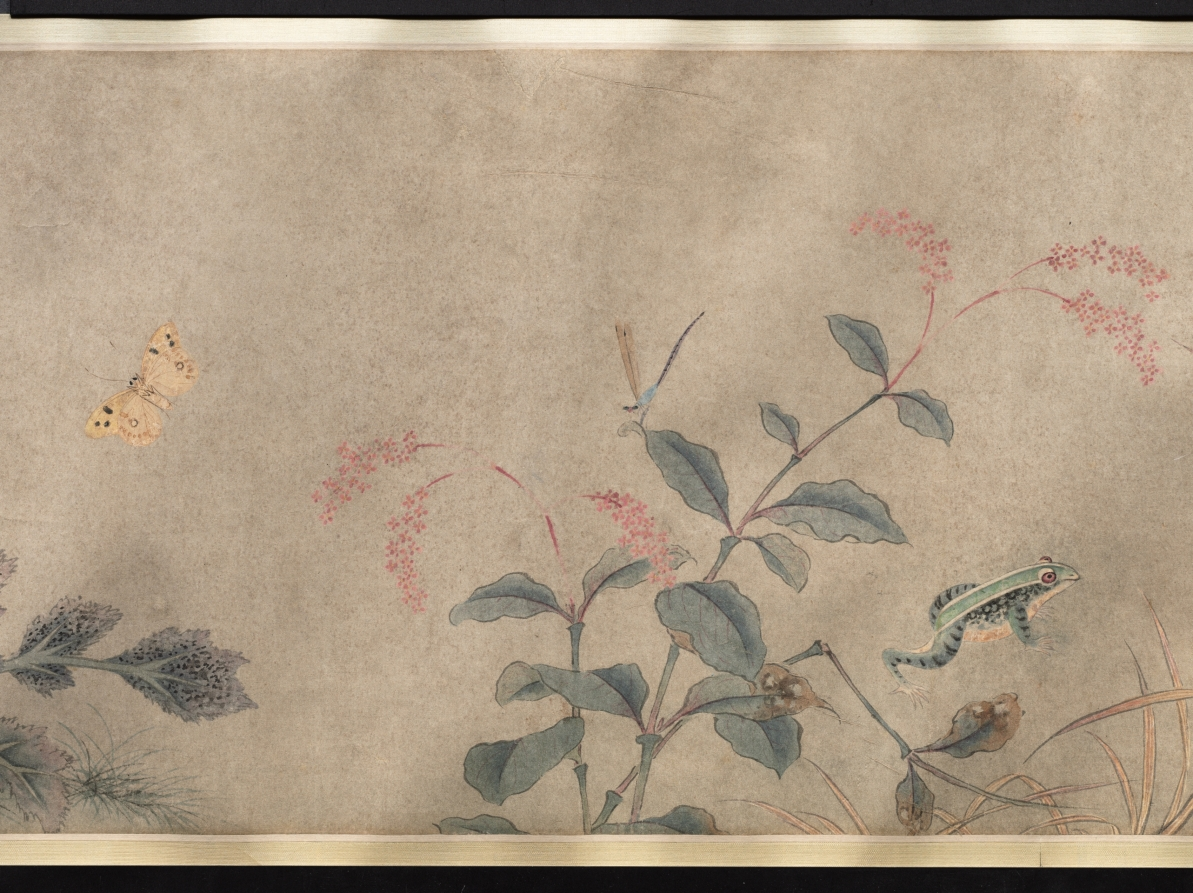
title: Insects and Flowers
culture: China, Qing dynasty (1644-1911) or Republican period (1912-49)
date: c. 1900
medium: Handscroll, ink and color on paper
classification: Painting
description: More than 26 feet long, this scroll presents insects, reptiles, and plants in delicate brushwork and pale colors, referring in style to earlier Southern Song dynasty (1127–1279) bird-and-flower paintings. Upon closer inspection, ants dismember a butterfly and reptiles wait to ambush their prey. An inscription at the end of the painting gives us an idea of its meaning: Attributed to the Qing dynasty scholar Zhang Xigeng (張錫庚, 1801–1861), the inscriber relates the work to an earlier painting by Qian Xuan (錢選, c. 1235–before 1307) and further suggests that the painting may allude to the relentlessness of natural selection. By drawing a parallel to tumultuous episodes in Chinese history, the writer might even hint at the domestic rebellions and the aggression of Western powers against China in his lifetime, particularly the Opium Wars (1839–60).